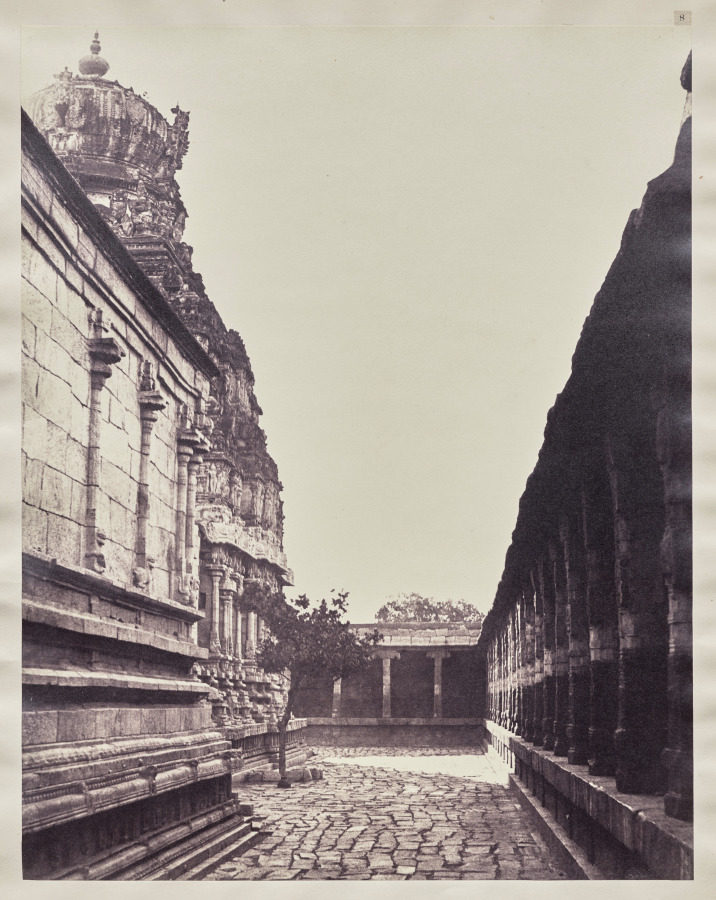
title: Perumal Temple Vimana from Corner of Court, Madurai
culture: England, 19th century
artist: Captain Linnaeus Tripe (British, 1822–1902)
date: 1858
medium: albumen print from a waxed paper negative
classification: Photograph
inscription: Imprinted in black type on white paper adhered to recto of mount: "8"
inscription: Embossed on recto of mount:"LT/Photographer to Government"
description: Although the temple would have been crowded with worshippers, Tripe shows us empty spaces. His paper negatives and primitive lens required long exposures, even in the bright sunlight of India—too long to record an individual in motion. Tripe, photographing for the colonial government, may also have used his official status to have the temple cleared of visitors so he could obtain unobstructed views of the architecture.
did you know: The architecture was probably painted with bright colors, but Linnaeus Tripe’s photographic technology captured only a monochromatic range of tones.